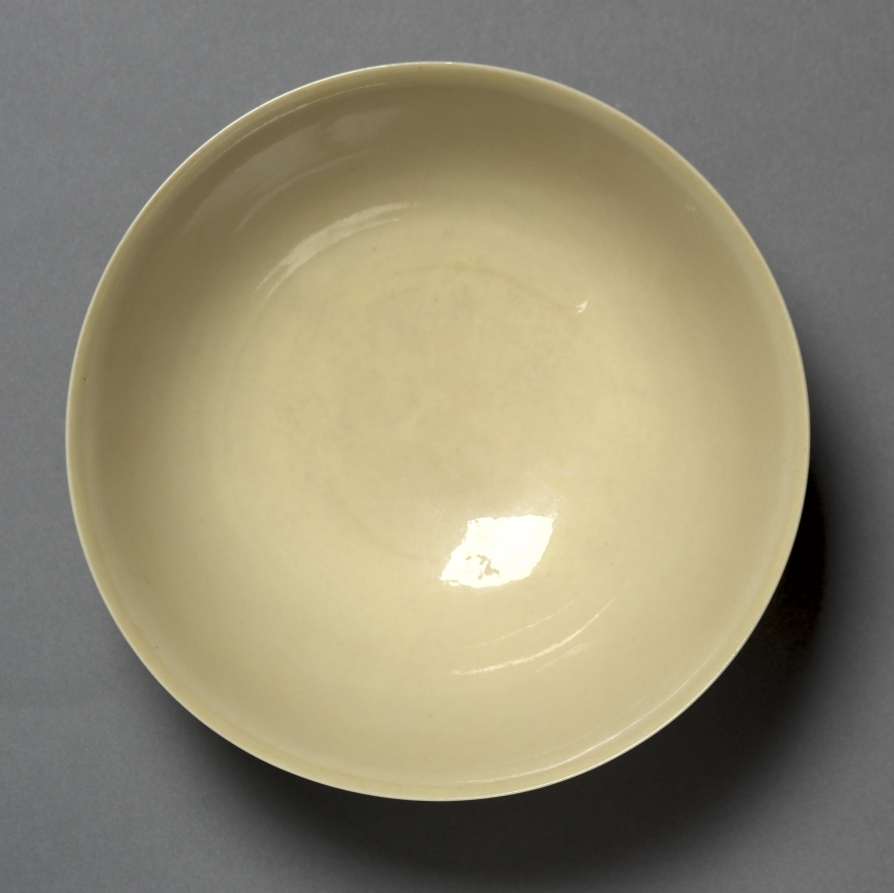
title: Bowl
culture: China, Jiangxi province, Jingdezhen, Ming dynasty (1368–1644), Hongzhi mark and period (1488–1505)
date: 1488–1505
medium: porcelain with yellow glaze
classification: Ceramic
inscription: 大明弘治年制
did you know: The six-character inscription on the base reveals this deep bowl was made during the reign of the Hongzhi emperor.